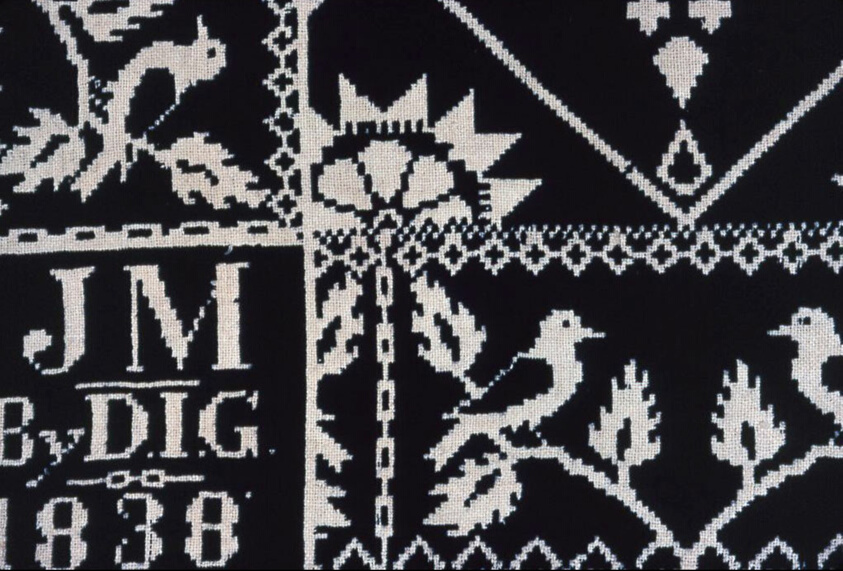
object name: Textile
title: Coverlet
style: 19th century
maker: David Isaac Grave (American, c. 1803-1864); United States, Indiana, Wayne County, Richmond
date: 1838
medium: Cotton and wool, plain weave double cloth; woven on loom with Jacquard attachment; two loom widths joined; fringed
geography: Indiana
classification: weaving - coverlet; coverlet; weaving; textile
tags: geometric, foliage, birds, squares, circles, diamond shapes, coverlet